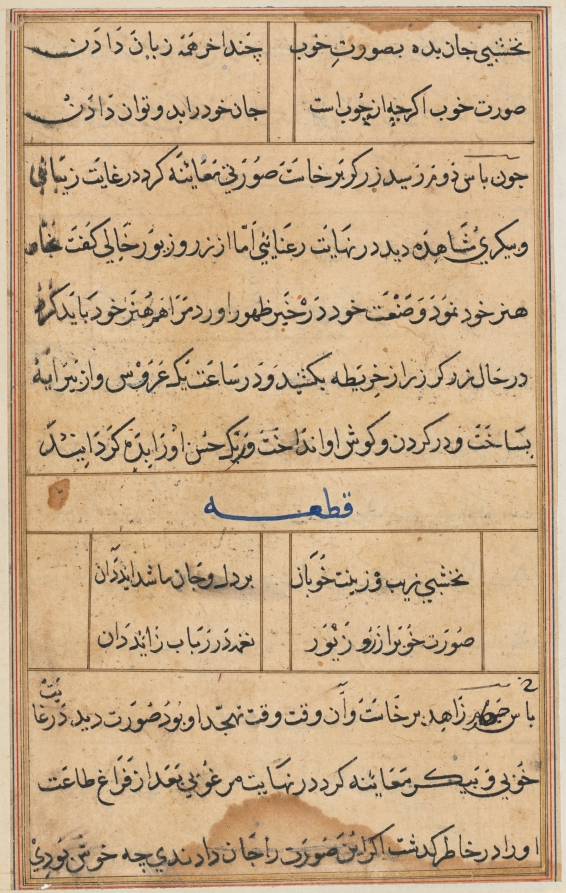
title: Page from Tales of a Parrot (Tuti-nama): text page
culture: Mughal India, court of Akbar (reigned 1556–1605)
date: c. 1560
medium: gum tempera, ink, and gold on paper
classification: Painting